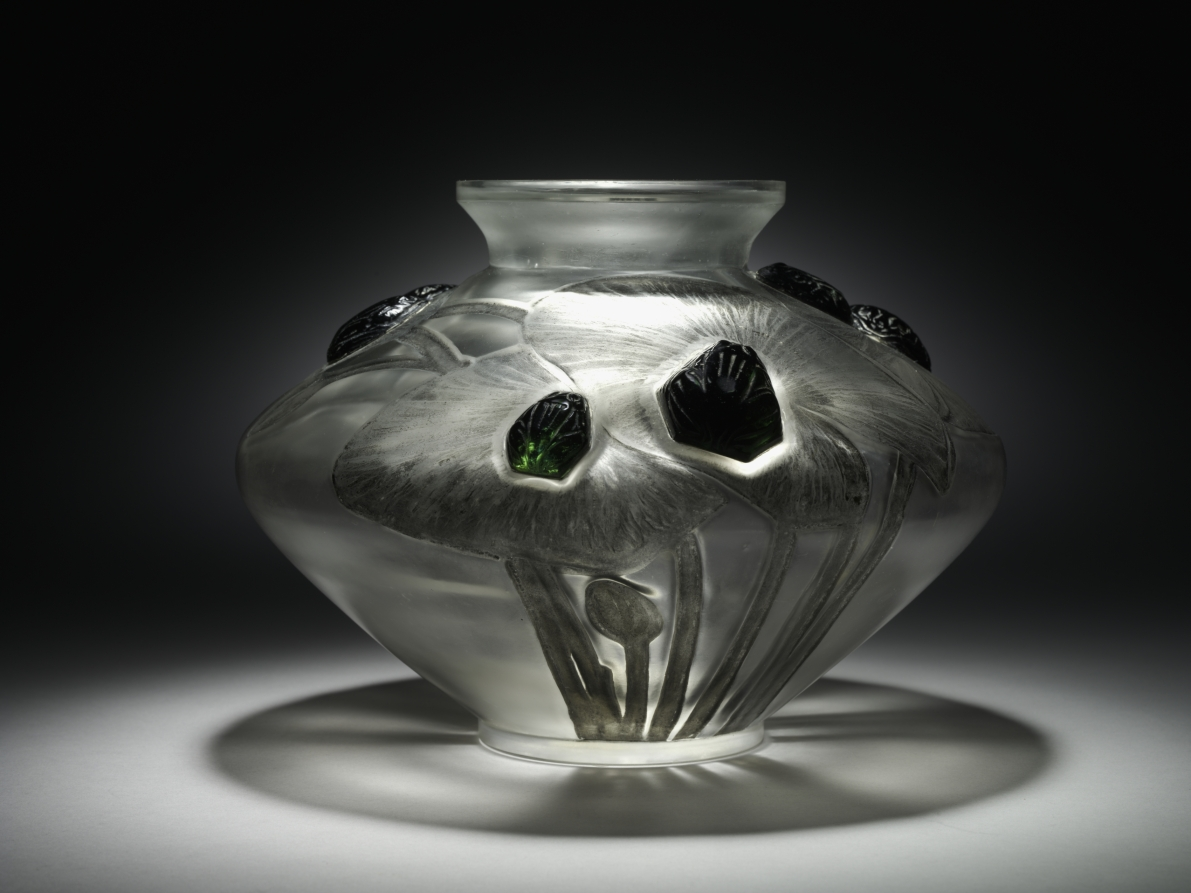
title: Frogs and Lily Pads (Grenouilles et Nénuphars) Vase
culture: France, 20th century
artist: René Lalique (French, 1860–1945)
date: 1909–12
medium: glass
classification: Glass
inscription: "R. Lalique"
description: This vase is an early example of French designer René Lalique's experimentation with producing artistic glass. Lalique combines applied, cast, and molded glass techniques to achieve an ethereal effect of a murky swamp, a typical Art Nouveau motif. Lily pads adorn the surface with green frogs perched on top.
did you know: René Lalique placed little sheets of metal foil behind the applied green frogs to reflect a dark green tint back to the viewer.